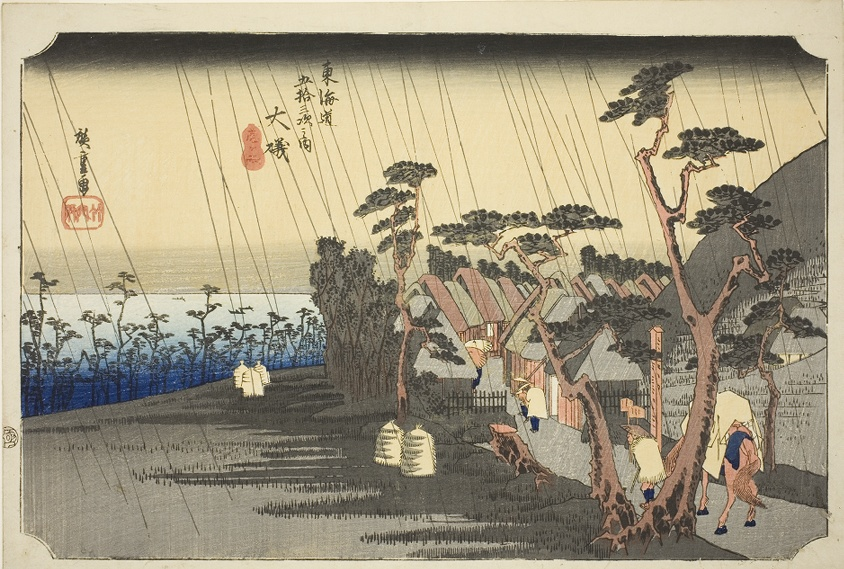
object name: Print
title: Oiso: Tora's Rain (Oiso, Tora ga ame), from the series "Fifty-three Stations of the Tokaido Road (Tokaido gojusan tsugi no uchi)," also known as the Hoeido Tokaido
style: Japanese (culture or style)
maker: Utagawa Hiroshige 歌川 広重; Japanese, 1797-1858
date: c. 1833/34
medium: Color woodblock print; oban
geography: Japan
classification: woodblock print; print; asian art